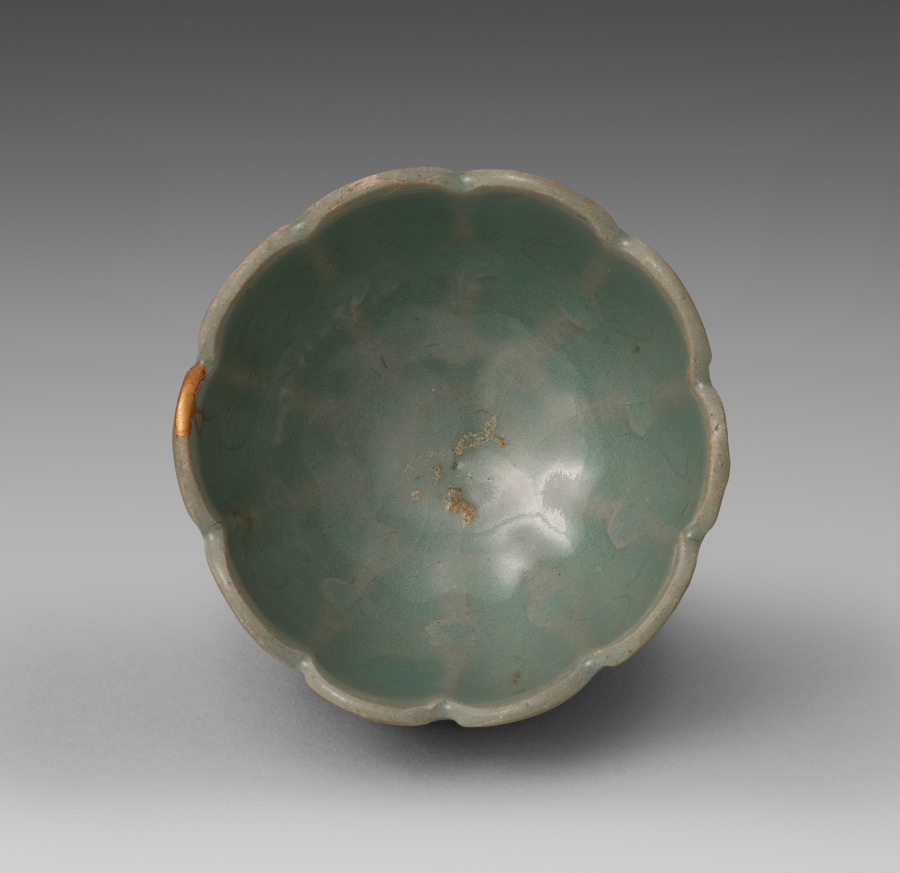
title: Floral-shaped Cup with Incised Chrysanthemum Design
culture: Korea, Goryeo dynasty (918–1392)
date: 1100s-1200s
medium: celadon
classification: Ceramic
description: Both everyday objects and ornaments such as this drinking cup were standard for Goryeo period (918–1392) burial goods. Furnishing tombs with an elaborate assemblage of objects was believed to honor and comfort the newly dead. While greenish celadon works were mainstream during the Goryeo period, bluish-white ceramic works made of white clay such as this one were produced from time to time.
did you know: Called kintsugi (literally meaning “gold joinery”) in Japanese, this method of repairing broken parts with glittering gold mixed with lacquer was extensively used for ceramic works in the Goryeo period, such as this cup.